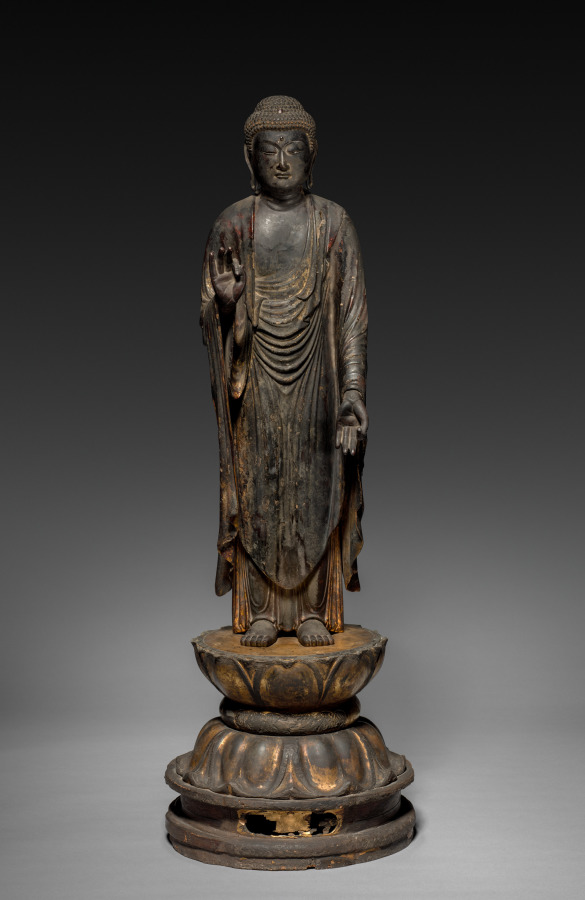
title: Amida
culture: Japan, Kamakura period (1185–1333)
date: 1200s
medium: Wood with lacquer and gilding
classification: Sculpture